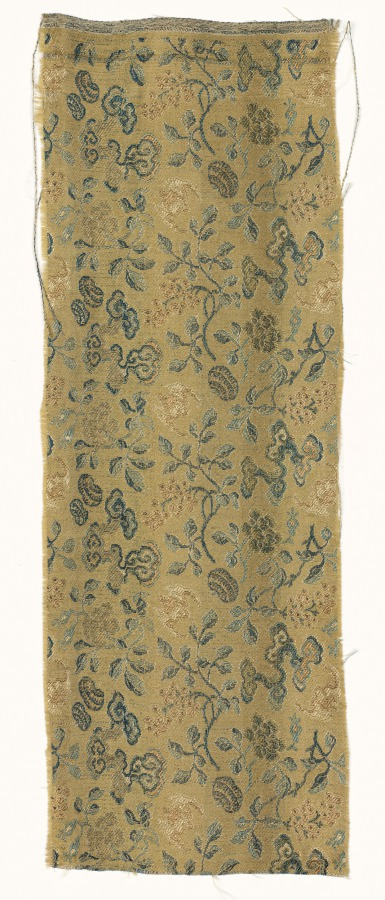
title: Fragment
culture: China, 18th century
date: 1700s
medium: satin ground; silk diasper weave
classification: Textile